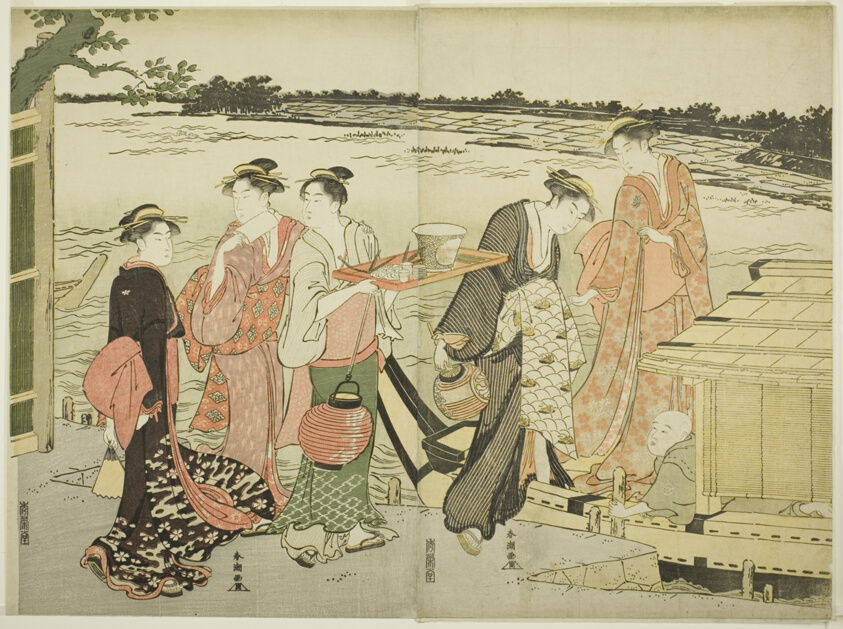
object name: Print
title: Women Boarding a Pleasure Boat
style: Japanese (culture or style)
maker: Katsukawa Shuncho; Japanese, active c. 1780-1801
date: 1780s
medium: Color woodblock print; oban diptych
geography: Japan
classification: woodblock print; print; asian art